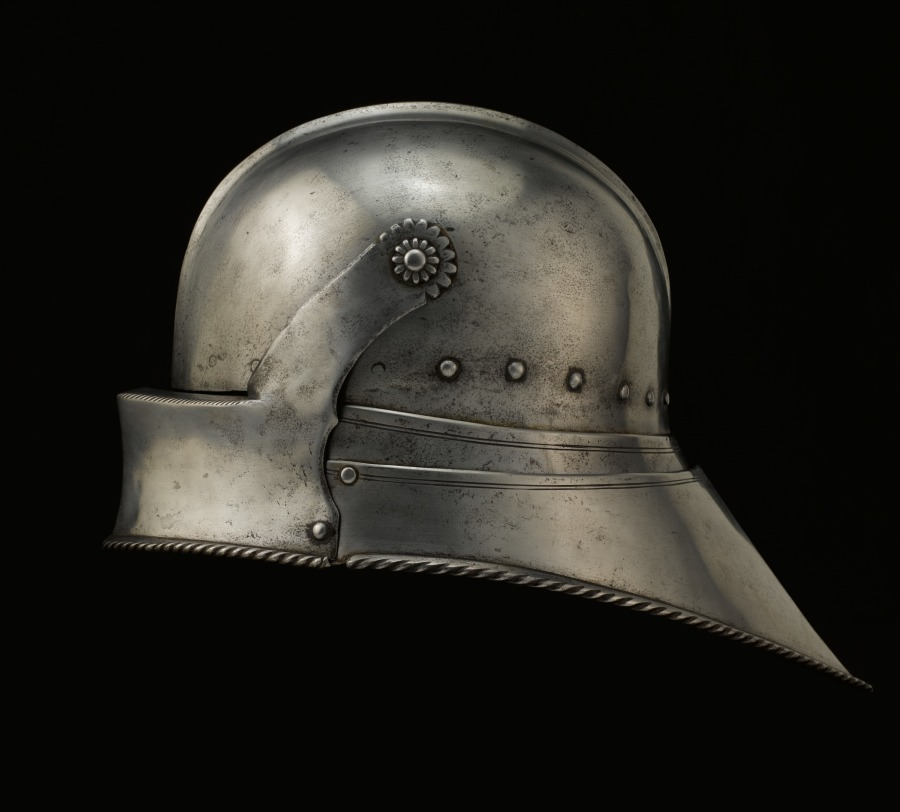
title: Visored Sallet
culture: Germany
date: c. 1490–1500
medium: steel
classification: Arms and Armor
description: The sallet is a partly open-face helmet common in Europe during the 1400s, used in both equestrian and infantry versions. Sallets with movable visors, like this example, are considered to be more technically and visually interesting; beautifully streamlined, it assumes a highly sculptural teardrop shape. Originally it would have been part of a complete suit of armor. The sallet became the quintessential helmet form of the late Middle Ages and is frequently represented in medieval miniatures and woodcuts.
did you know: Medieval sallets were design inspiration for modern-day fireman's helmets.